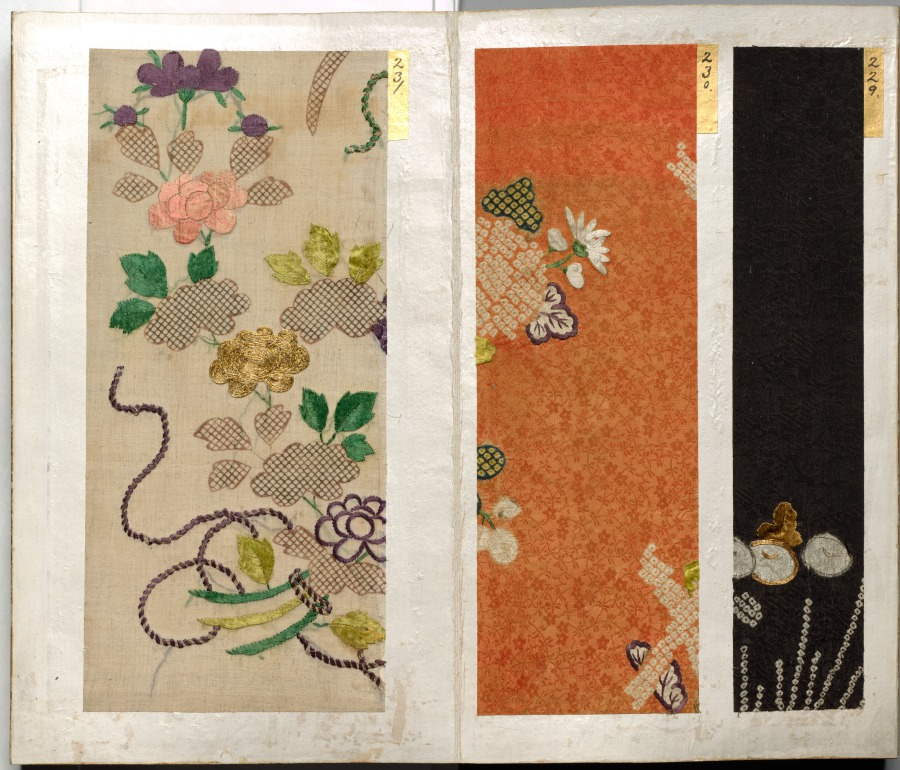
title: Album of Textile Samples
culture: Japan, Edo period (1615–1868)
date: 1600s-1700s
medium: silk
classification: Textile